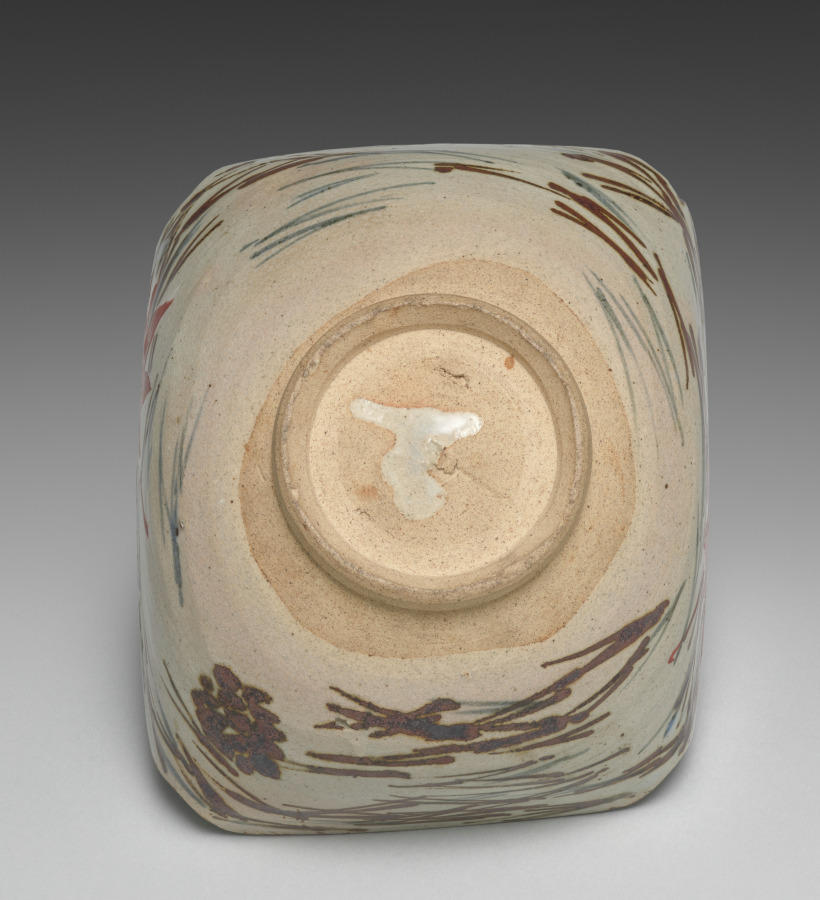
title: Nesting Dish with Scattered Pine Needles and Maple Leaves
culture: Japan, Edo period (1615–1868)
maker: Seifū Yohei I (Japanese, 1801–1861)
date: 1861–78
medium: One of a pair of side dishes; stoneware with underglaze blue and iron oxide, white slip, and overglaze color enamel (Kyoto ware)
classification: Ceramic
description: Seifū Yohei I made both blue and white porcelains after Ming dynasty (1368–1644) Chinese wares fired in the kilns at Jingdezhen for export. He also made colorful stoneware in the style of his teacher, Nin’ami Dōhachi (Takahashi Dōhachi II) (1783–1855).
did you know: Where he intended to place the maple leaves, Yohei I first applied a white color, which can be seen around the leaf edges under the glaze. This layering on top of the white brightens the color of the translucent red overglaze.